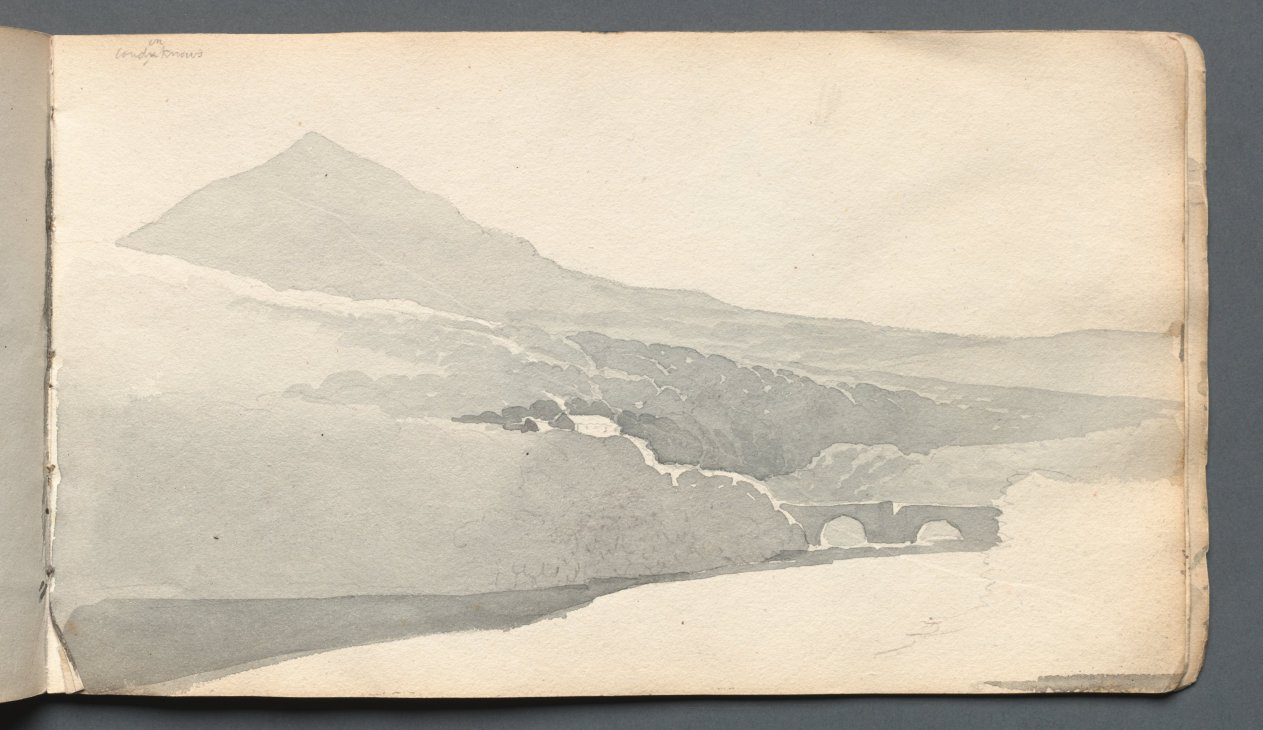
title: Sketchbook: "Mountainous Landscape with Bridge"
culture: England, 19th century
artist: Samuel Prout (British, 1783–1852)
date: 1814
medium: graphite with gray wash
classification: Bound Volume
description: John Ruskin (also in this gallery) admired Prout’s strength as a draftsman. Like the topographical watercolorists of the 18th century, Prout emphasized form over color in his watercolors, as is evident in the monochromatic, delicate English views in this sketchbook.